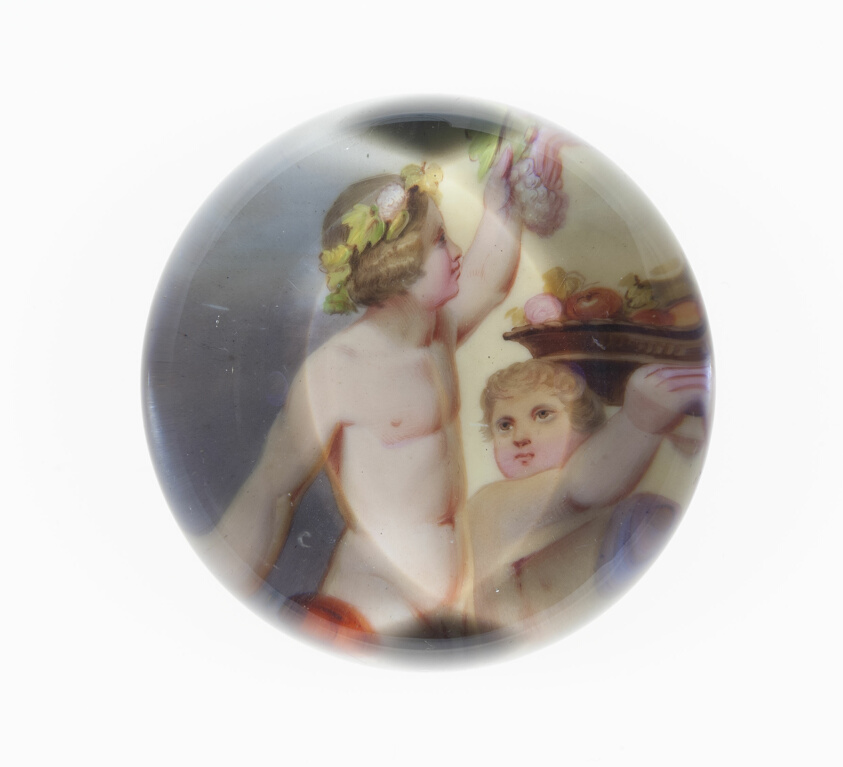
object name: Glass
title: Paperweight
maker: European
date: 19th century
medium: Glass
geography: Europe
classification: paperweight; glass